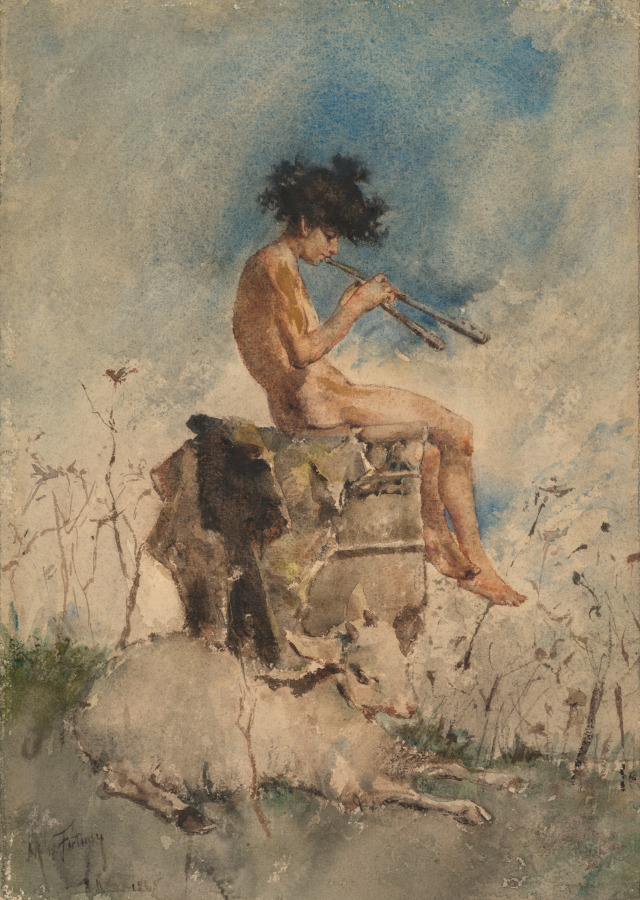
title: The Pipes of Pan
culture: Spain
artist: Mariano Fortuny (Spanish, 1838–1874)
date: 1865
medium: Watercolor with traces of pen and black ink; border in graphite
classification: Drawing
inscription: lower left, in brown ink: M Fortuny / Roma 1865